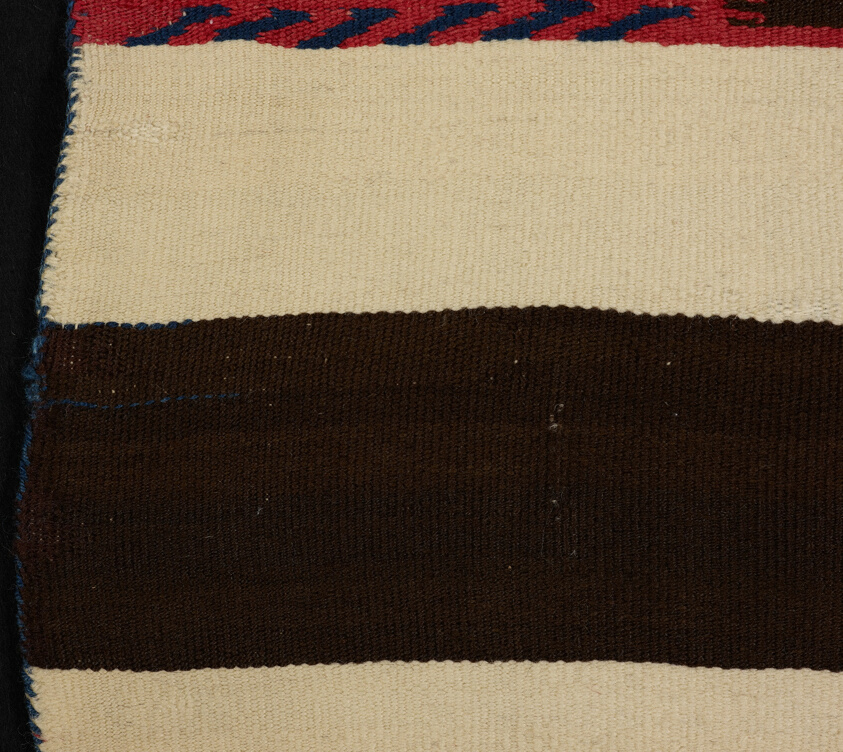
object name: Costume and Accessories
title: Wearing Blanket (Phase II)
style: navajo, americas, dine, 19th century, Arts of the Americas, indigenous, southwest, native american, north american, native north american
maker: Navajo (Diné) (Arizona, New Mexico, and Utah, United States)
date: 1850-65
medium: Wool; single interlocking tapestry weave; twined edges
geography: Navajo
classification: textile; blanket (covering); costume; garment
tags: geometric, arrow, squares, stripes